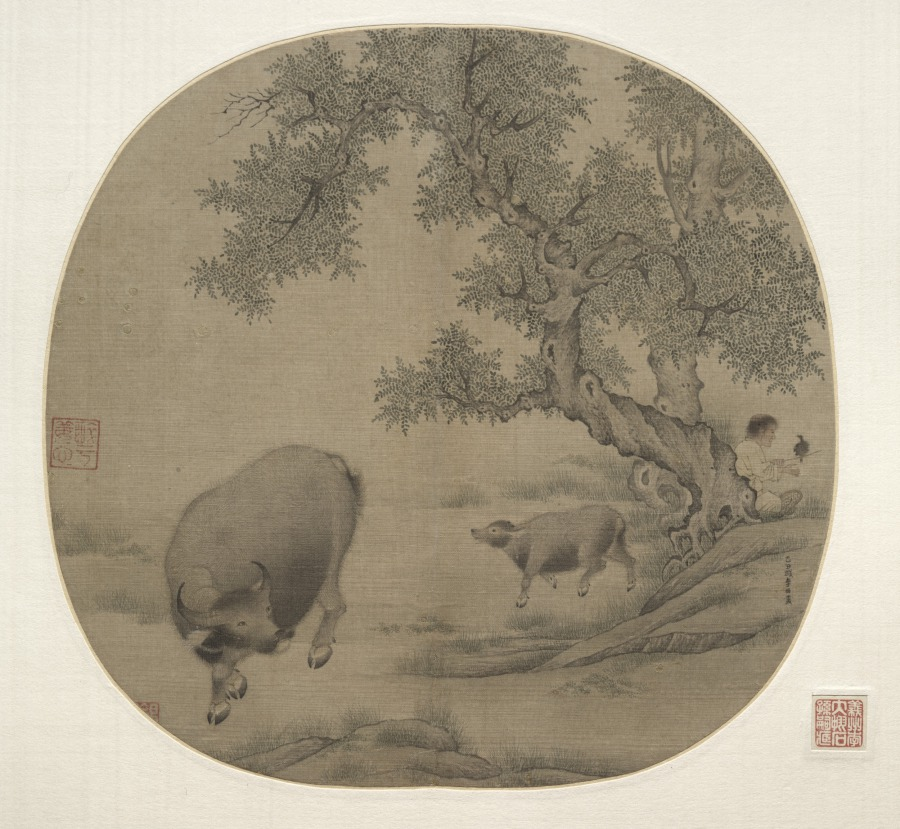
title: Man, Buffalo, and Calf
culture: China, Southern Song dynasty (1127-1279)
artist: Li You (Chinese, active c. 1145)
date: 1145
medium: album leaf; ink and color on silk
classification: Painting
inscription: Artist's inscription: 乙丑歲李祐/椿畫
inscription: 3 seals: 1 of Wu T'ing (c. 1600); 1 of An Kuo (1481–1534); 1 of Li Pao-hsün (1858–1915)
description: Here, a herdboy tending a cow with a calf is sitting beneath a tree with his pet myna bird. The painting can be read as a pastoral scene. As the water buffalo helped plow the fields, it was perceived as an animal that endures hard work without gain for itself, often interpreted as a metaphor for the official. Ox-herding pictures, presented as gifts in court circles, were used for their moral and political rhetoric. The Yijing (Book of Changes) states, The Receptive is the earth, the mother . . . it is a cow with a calf . . . the multitude [in relation to the ruler].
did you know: Li You included such tiny details as circular patterns of hair on the buffalo’s hindquarters.